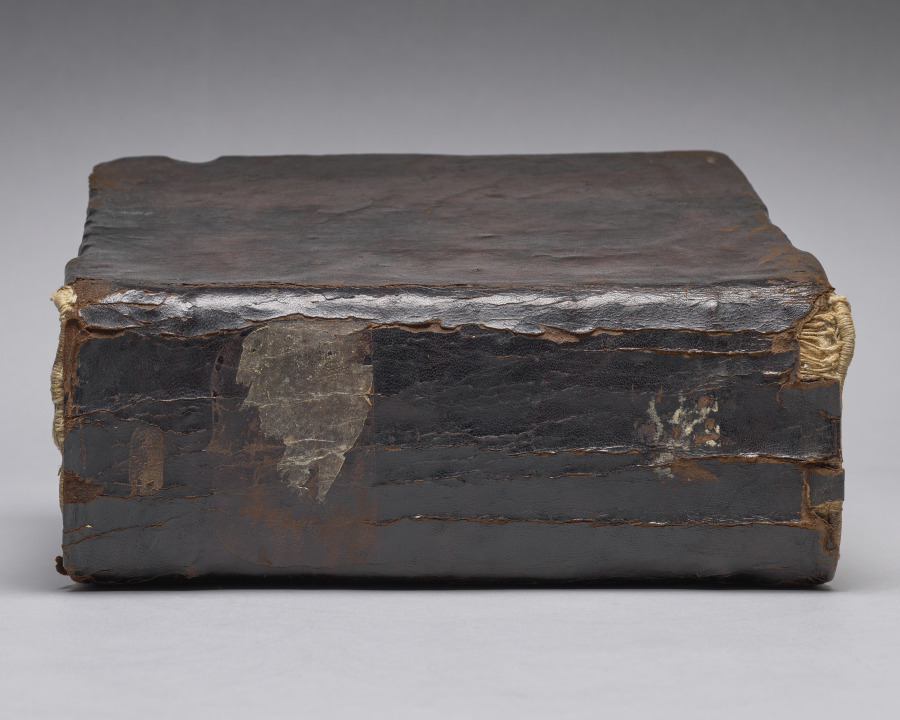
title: Gospel Book with Commentaries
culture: Byzantium, Constantinople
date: c. 1000–1100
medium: ink, tempera, and gold on vellum; leather binding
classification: Bound Volume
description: Each of the four Gospels in this book opens on a page with brilliantly illuminated borders depicting the author of the text as well as birds—principally peacocks, symbols of the immortality of the soul— and fountains, representing the fountain of life and the salvation of the soul. This volume consists of 428 leaves with texts in Greek. Its high level of sophistication is characteristic of monasteries in Constantinople.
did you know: Gospel Books were carried in procession through Byzantine churches.